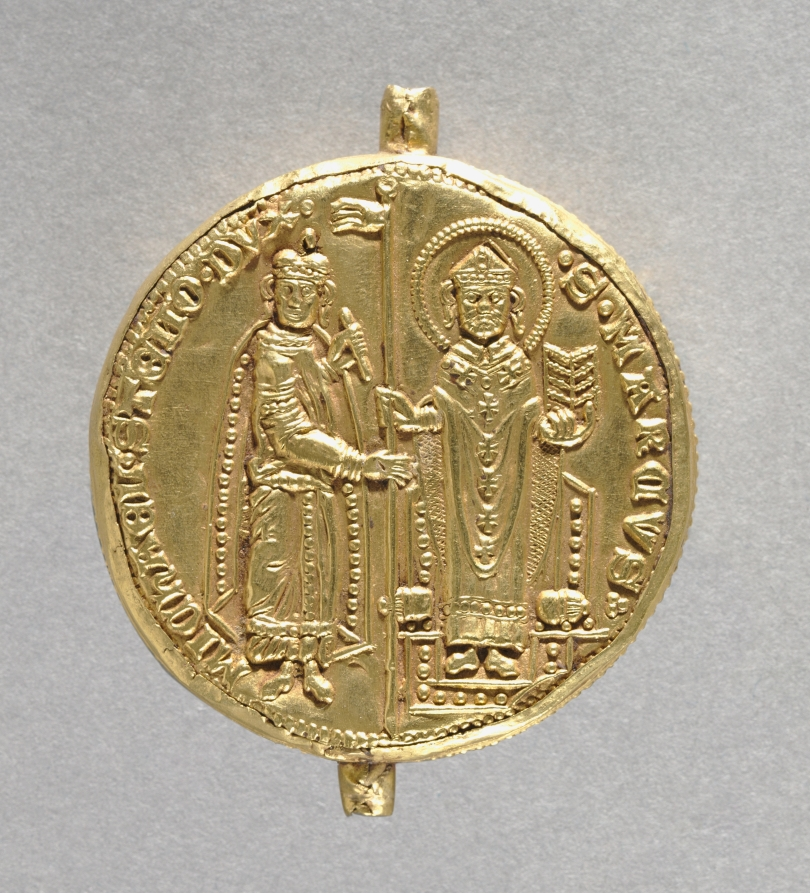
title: Seal of Doge Michele Steno (obverse)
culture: Italy, Venice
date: 1400–1409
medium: repousé gold over a core of wax and resin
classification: Metalwork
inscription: the figures of the Doge and St. Mark are identified by the inscription.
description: This opulent seal, an example of the splendor surrounding the ruler of Venice, was once attached to a charter issued in 1409. Seals were molded or embossed and attached to official documents as evidence of authenticity. This example is thought to be one of the finest Venetian seals to be preserved.